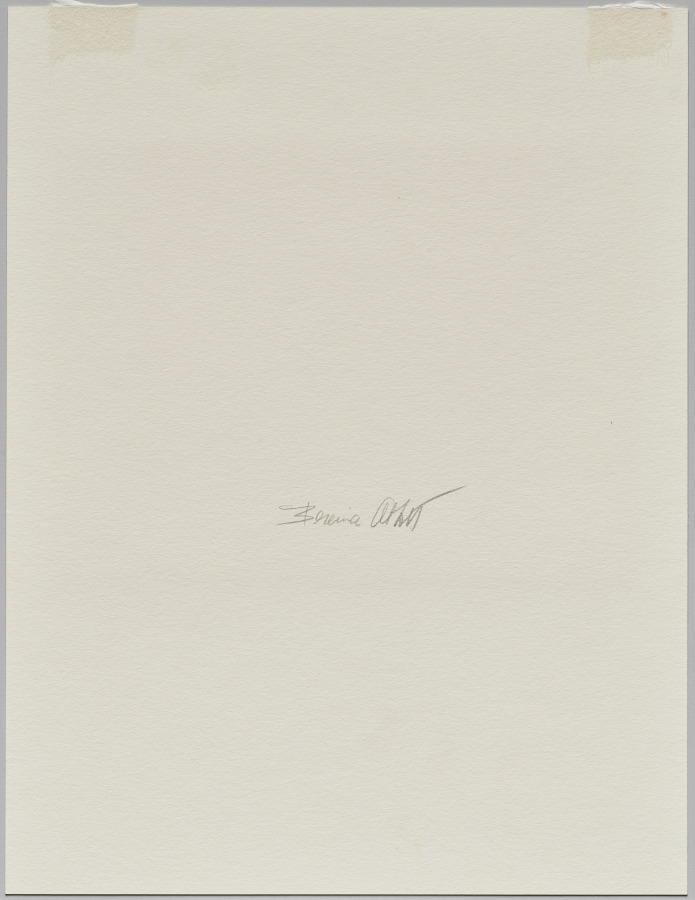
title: St. Cloud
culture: France, 20th century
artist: Eugène Atget (French, 1857–1927)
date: 1915–19, printed 1931-late 1950s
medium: gelatin silver print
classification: Photograph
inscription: Written in pencil on verso: "Eugene Atget"